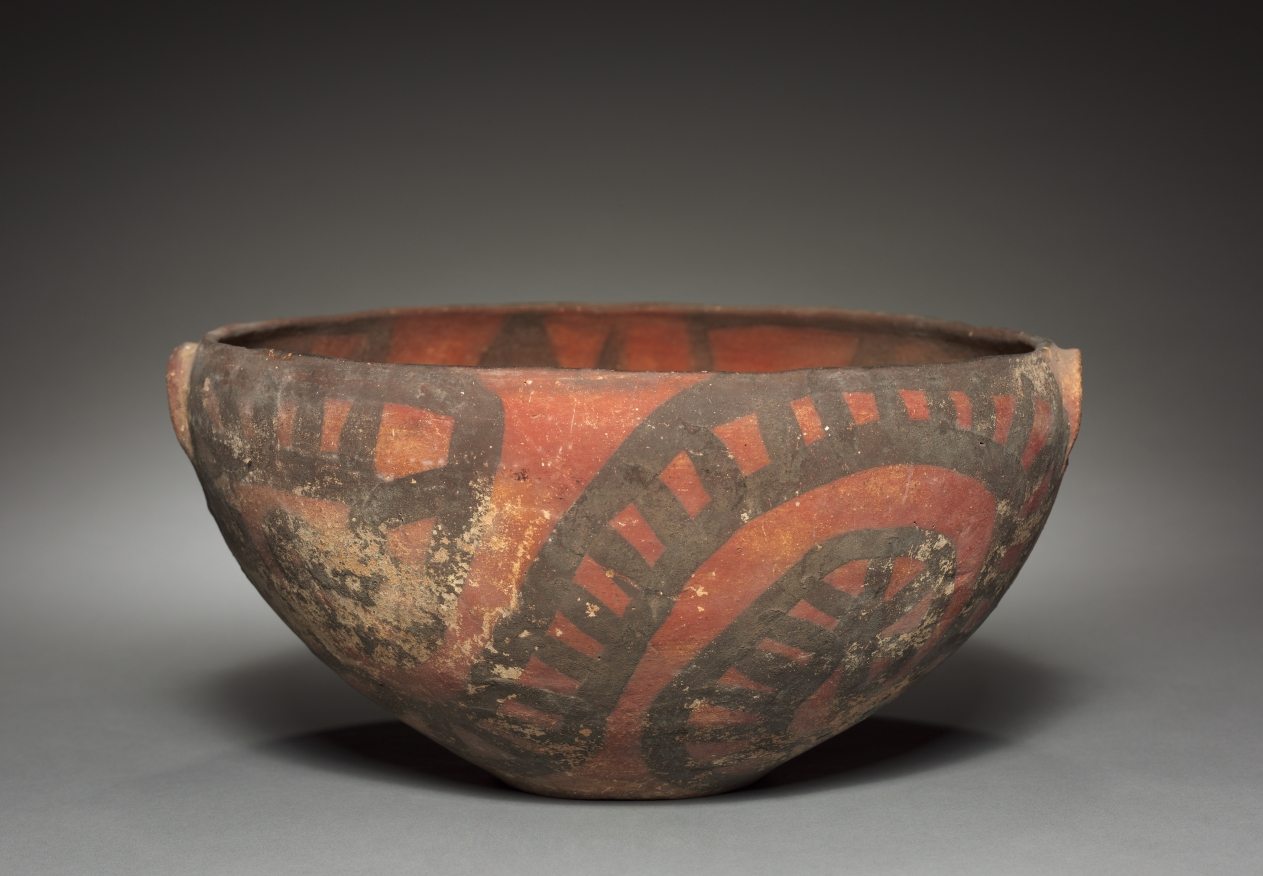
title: Two-Handled Bowl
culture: Argentina, Santamariana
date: 1000–1500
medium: earthenware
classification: Ceramic